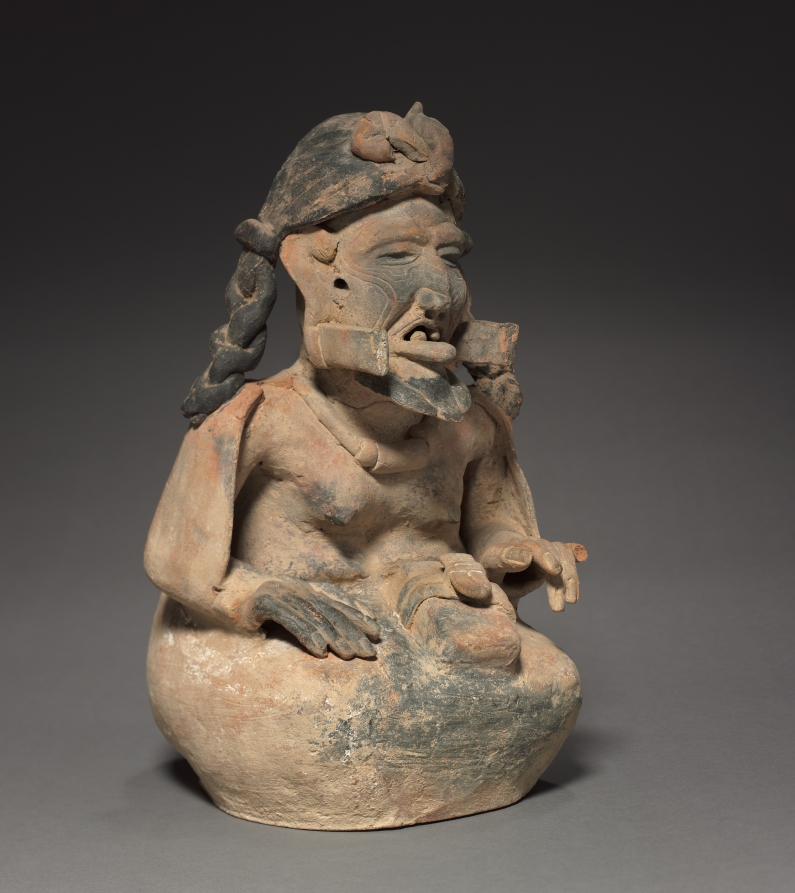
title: Elderly Figure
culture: Mexico, Campeche, Veracruz Monumental Sculpture Type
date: 600–900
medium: molded and modeled pottery with gray, tan and black paint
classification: Sculpture